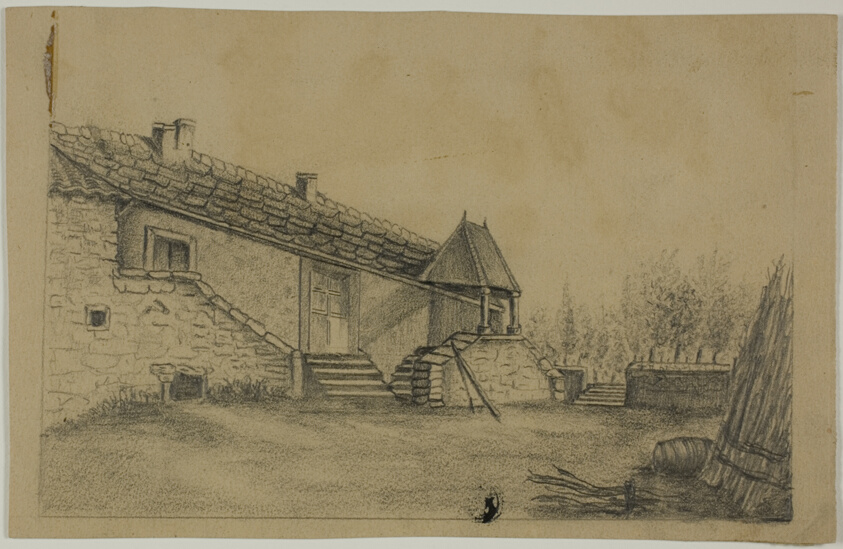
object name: Drawing and Watercolor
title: Closed Farmhouse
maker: Unknown Artist; British, 1800-1899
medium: Graphite on tan wove paper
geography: United Kingdom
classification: graphite; drawings (visual works); prints and drawing